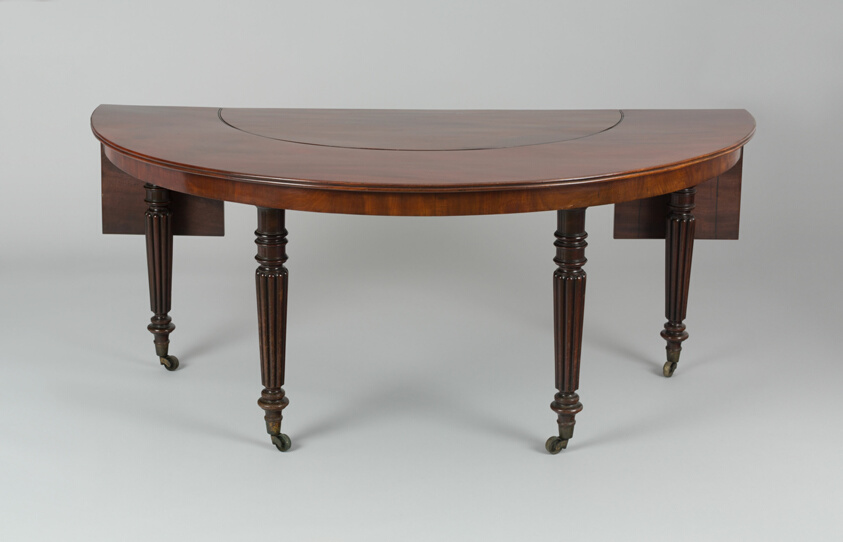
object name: Furniture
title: Wine Tasting Table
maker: Ireland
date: 19th century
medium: Mahogany and gilt metal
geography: Ireland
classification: table; furniture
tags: furniture